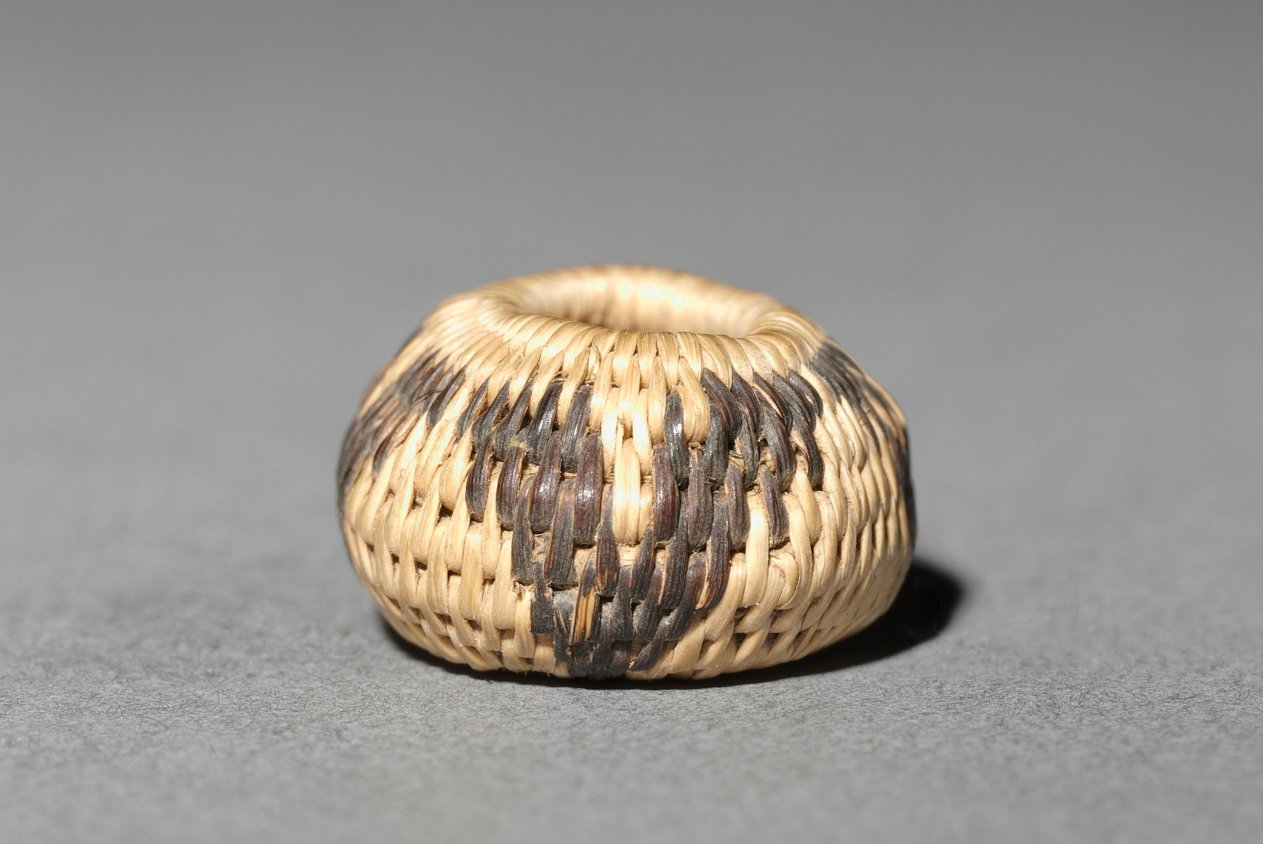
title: Miniature Basket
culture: America, Native North American, Southwest, Arizona, Akimel O'odham (Pima), Unassigned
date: before 1923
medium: plant fiber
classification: Basketry